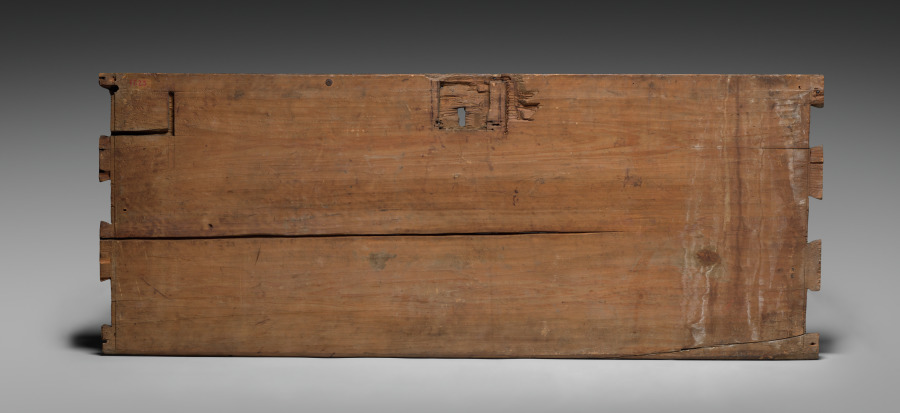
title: Chest Front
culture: India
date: c. 1700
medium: wood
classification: Furniture and woodwork